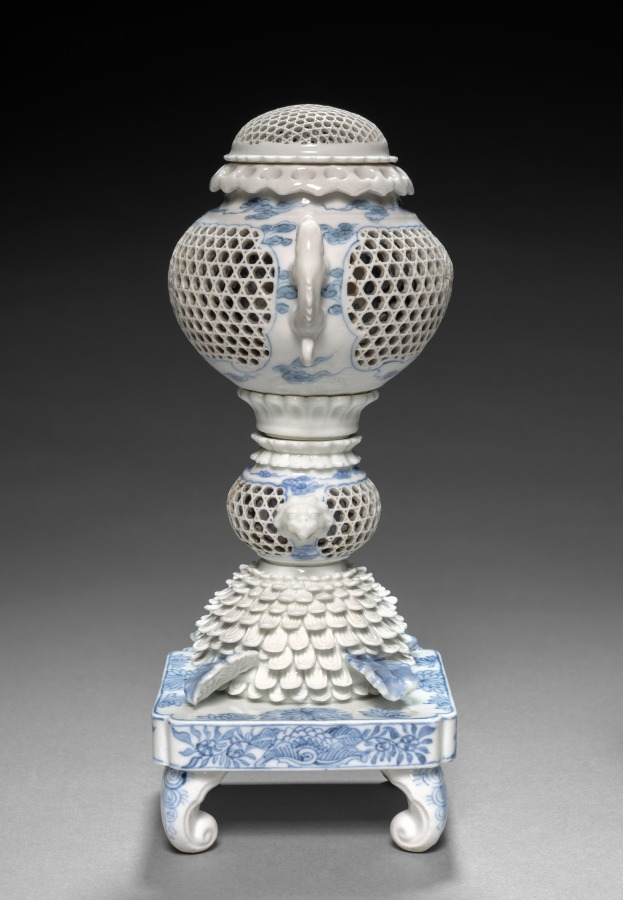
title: Chrysanthemum Censer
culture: Japan, Edo period (1615–1868)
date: 1700s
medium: Porcelain with underglaze blue (Hirado ware)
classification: Ceramic